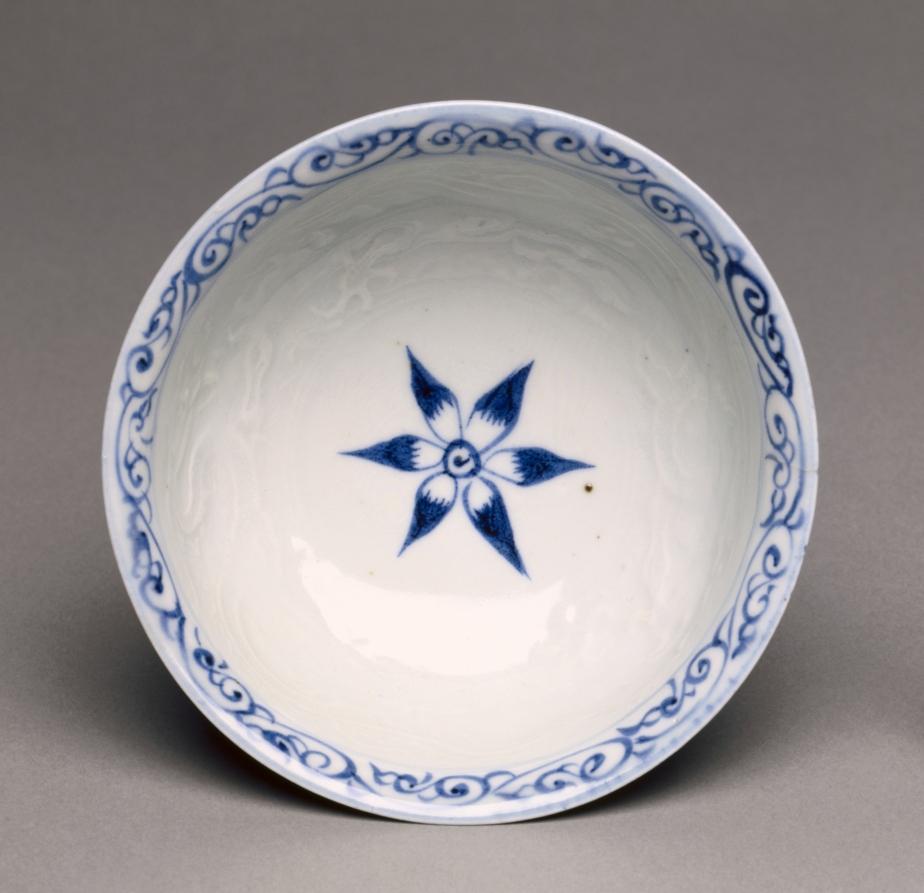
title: Stem Cup with Dragon Pursuing Flaming Jewel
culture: China, Jiangxi Province, Jingdezhen kilns, Yuan dynasty (1271–1368)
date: 1300s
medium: porcelain with underglaze cobalt blue and molded decoration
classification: Ceramic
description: The stem cup as a porcelain vessel shape was introduced to China by the Mongols from Northeast Asia when they ruled the country in the 14th century.